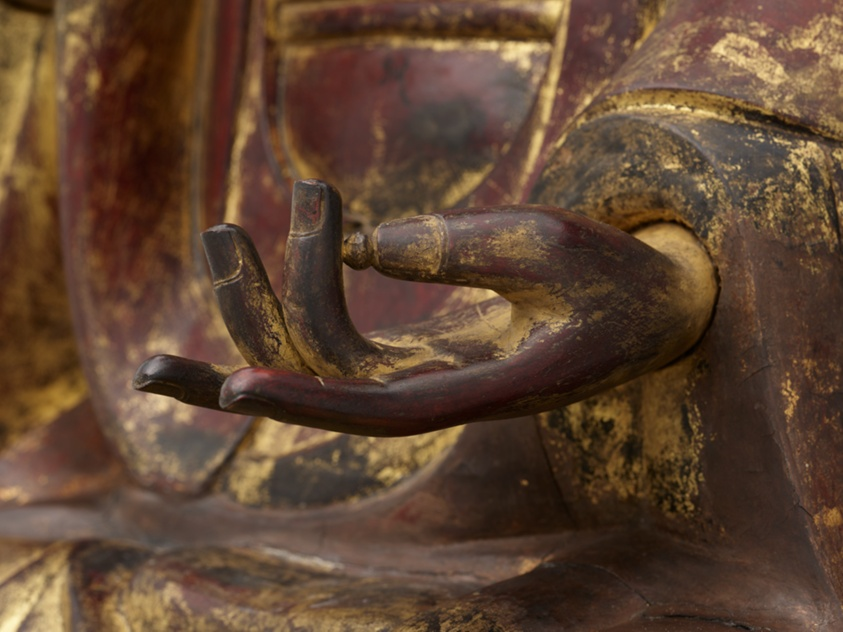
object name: Sculpture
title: Buddha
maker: Korea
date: Joseon dynasty (1392-1897), 18th century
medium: Lacquered wood with gilding, pigment, and glass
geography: Korea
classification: wood; sculpture; asian art